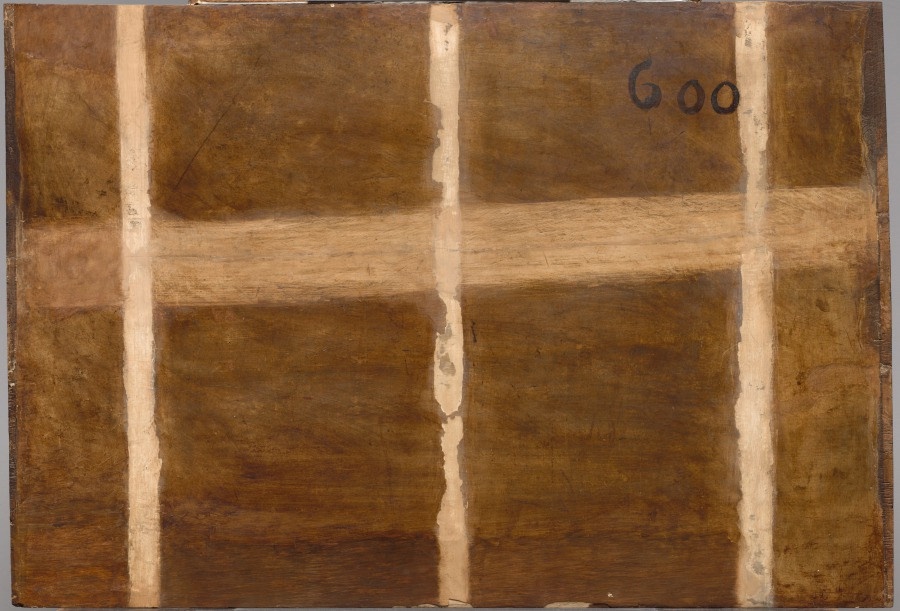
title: Still Life with Meat, Fish, Vegetables, and Fruit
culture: Flanders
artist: Jacob van Hulsdonck (Flemish, 1582–1647)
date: c. 1615–20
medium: Oil on panel, the reverse prepared with gesso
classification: Painting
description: Jacob van Hulsdonck depicted a colorful array of foods, and tablewares ranging from an earthenware trencher to delicate Chinese porcelain—an expensive luxury made possible by international trade. For seventeenth-century viewers, the quantity and variety of foods would have represented a utopian world without scarcity or hunger. Partially eaten food and an overturned glass suggest that diners have just departed, leaving insects to explore the remains.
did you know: Hulsdonck thoughtfully included condiments here: butter, lemon, parsley for the trotters, and a dab of mustard for the ham.